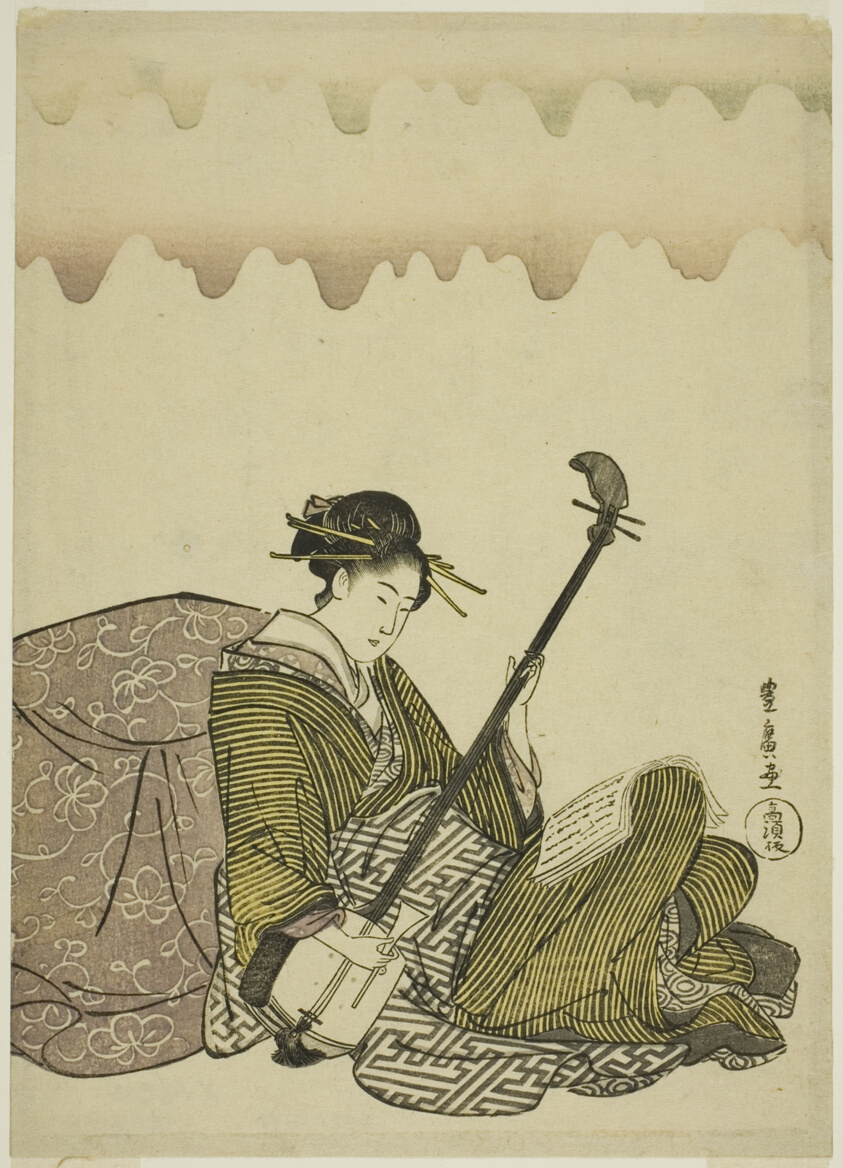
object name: Print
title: Woman playing shamisen, from an untitled series of women at leisure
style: Japanese (culture or style)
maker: Utagawa Toyohiro (Japanese, 1773-1828)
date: c. 1795/1800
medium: Color woodblock print; chuban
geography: Japan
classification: woodblock print; print; asian art